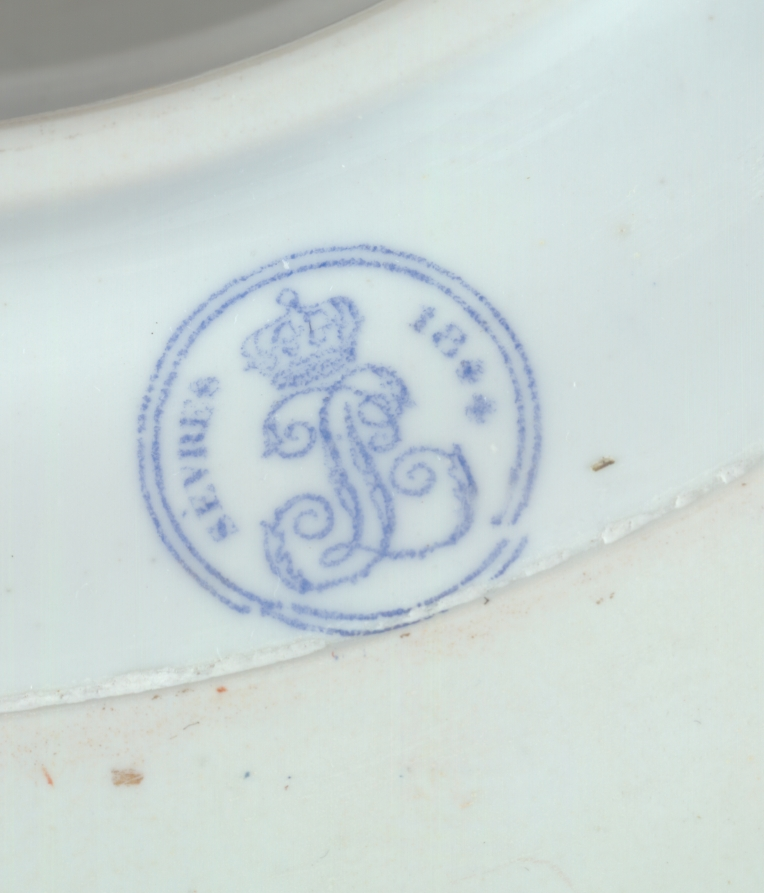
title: Standing Cup and Cover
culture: France, Sèvres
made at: Sèvres Porcelain Factory (French, est. 1756)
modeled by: Hyacinthe-Jean Regnier (French, 1803–1870)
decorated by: Francois-Hubert Barbin (French, 1786-)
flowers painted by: Jacques-Nicolas Sinsson (French)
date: 1844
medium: porcelain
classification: Ceramic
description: The official French porcelain factory at Sèvres has always been one of Europe's most important ceramic manufacturers, famous for its decorative pieces as well as more utilitarian wares. This vase in the Renaissance style, its design inspired by 16th-century French examples, is clearly in the tradition of elaborately conceived and decorated pieces intended for use by the French court or as presentation pieces by its monarchs. The latter was the fate of this Covered Cup, acquired in 1846 by Queen Marie-Amélie d'Orleans, the wife of Louis-Philippe, king during the July Monarchy (1830-48). Soon thereafter the vase was presented to a now unknown person. It is one of four pieces of this design made at the Sèvres factory, and the only one known today to have survived.